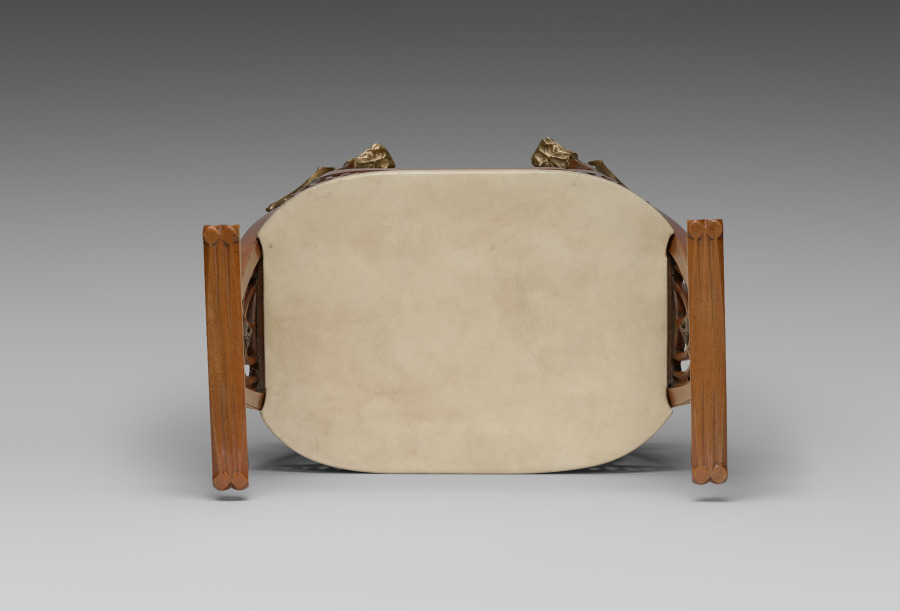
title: Tabouret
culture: France, Paris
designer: Carlo Bugatti (Italian, 1856–1940)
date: c. 1907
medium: Mahogany, parchment, gilt bronze, mother-of-pearl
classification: Furniture and woodwork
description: Although this tabouret is undocumented, its design, with its interlaced ovoid forms, gilt cast metal mounts, and mother-of-pearl inlays, is so close in style to the Cleveland Museum of Art’s celebrated tea table (1991.45) that it too can be assigned to Bugatti's Parisian period and dated about 1907.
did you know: Carlo Bugatti's son Ettore founded the luxurious car company Bugatti Automobiles.